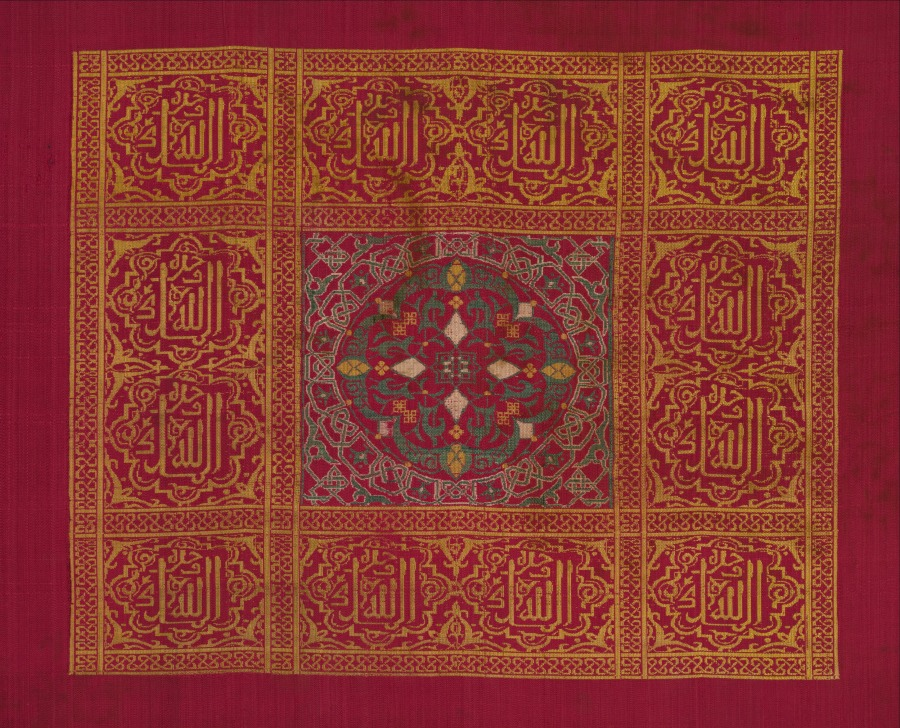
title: Silk curtain from the Alhambra palace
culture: Spain, Granada, Nasrid period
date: 1300s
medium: lampas and taqueté: silk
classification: Textile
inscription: the bold knotted Kufic inscription in the top and bottom borders of the side panels repeats the Arabic word "felicity." Within the arches forming a frieze in the top border is a Kufic inscription "good fortune" and a Naskhi inscription repeating trhe motto of the Nasrid dynasty, "There is no conqueror but God." In the borders of the three large ornamental rectangles on each side panel is the Naskhi inscription "Dominion belongs to God alone." On the central panel the inscriptions in the borders repeat the phrase, "Majestry is God's," while the Nasrid motto, "There is no conqueror but God" and, above, "Blessing," are inscribed in the arabesque ogives.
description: This is one of two of the largest, most complete, and most ornate curtains to survive from the 1300s when it presumably hung in the royal Alhambra Palace in Granada, the last Muslim stronghold in Spain. Its style, artistic vocabulary, and harmonious proportions reflect the magnificent wall decoration in the Alhambra. The motto of the ruling Nasrid dynasty, "There is no conqueror but God," is inscribed in the end borders and central panel. The inscribed striped silk forming the central panel is more worn, suggesting that it was recycled, most likely during the 1300s.